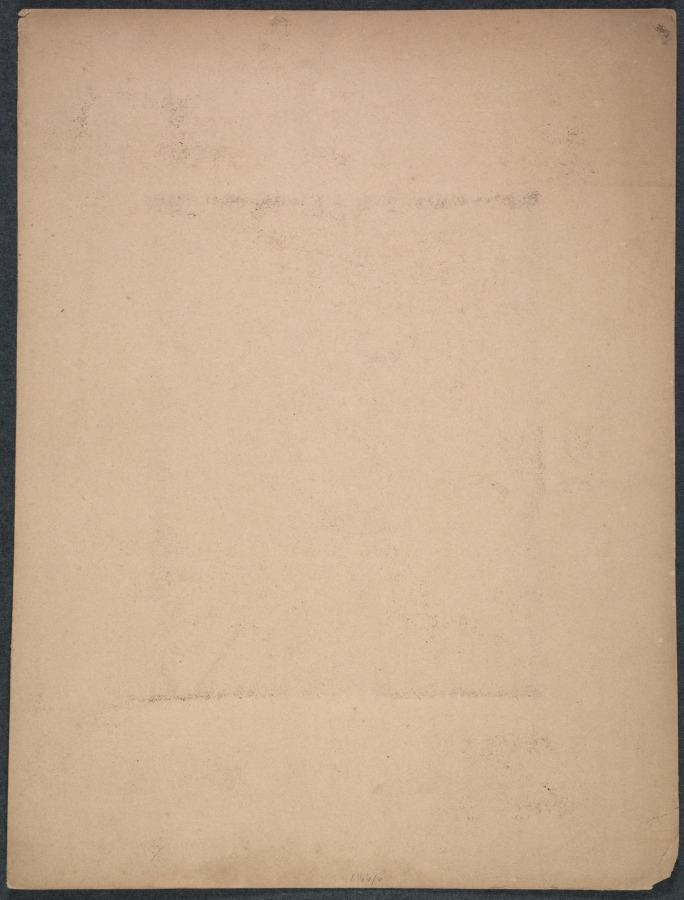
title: Ajinta Cave No. 19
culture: England, 19th century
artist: Francis Frith & Co. (British)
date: 1850s-1870s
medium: Albumen print from wet collodion negative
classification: Photograph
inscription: Albumen print from wet collodion negative Printed in red on recto of mount: "A.8." Written in black on recto of mount: "Ajinta Cave 19 Carvings" Written in pencil on recto of mount: "A" Written in pencil on recto of mount: "1000" Written in pencil on verso of mount: "8166/6"